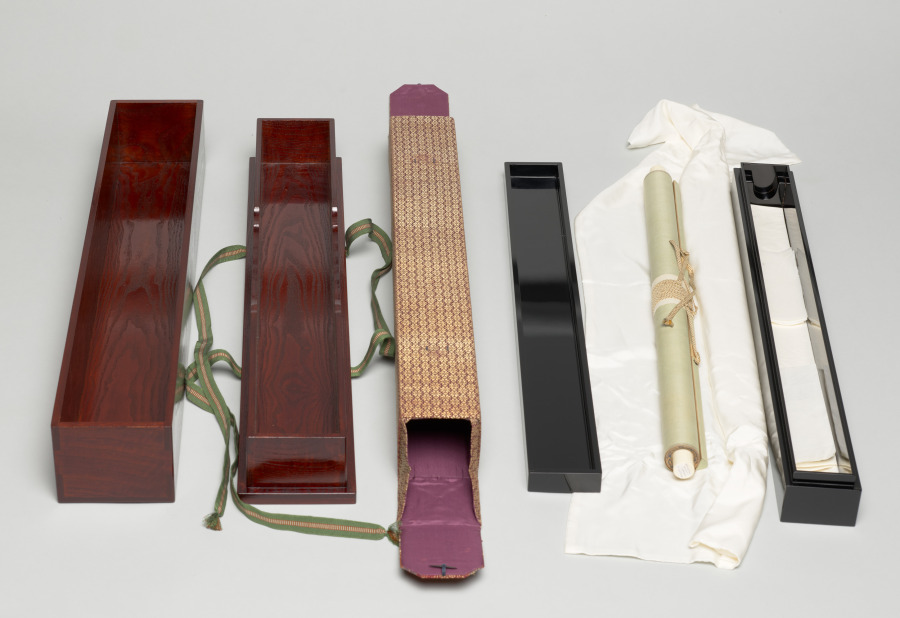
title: Coastal Landscape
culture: Japan, Momoyama period (1573–1615)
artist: Iwasa Matabei (Japanese, 1578–1650)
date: 1573–1615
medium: hanging scroll; ink on paper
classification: Painting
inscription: signed: signature unread